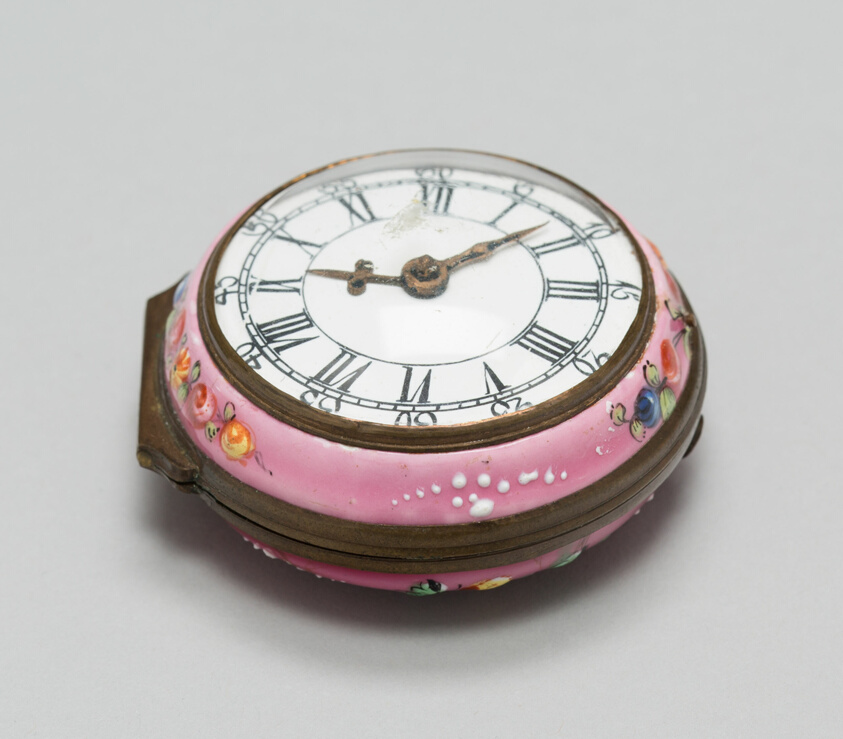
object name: Metalwork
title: Box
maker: Bilston, England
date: c. 1770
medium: Metal and enamel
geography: Bilston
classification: enamel; metalwork